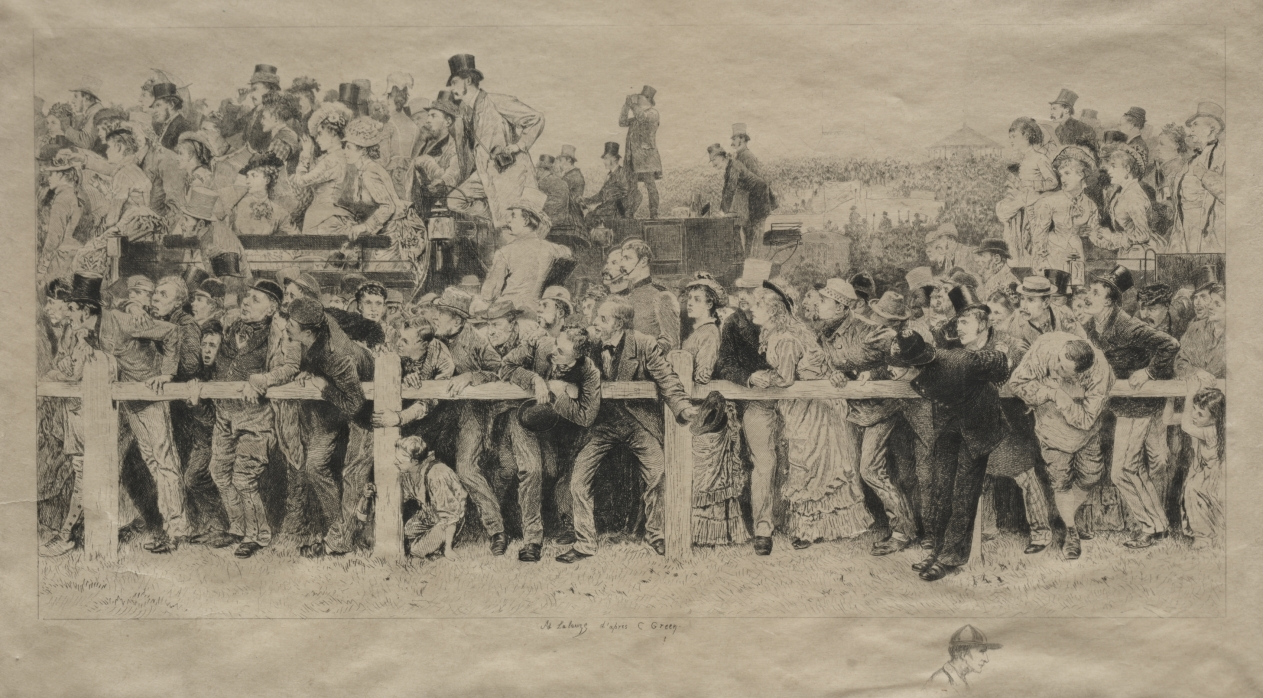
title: A Scene at the Derby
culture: France, 19th century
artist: Adlophe Lalauze (French, 1838–1906)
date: c. 1878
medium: etching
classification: Print